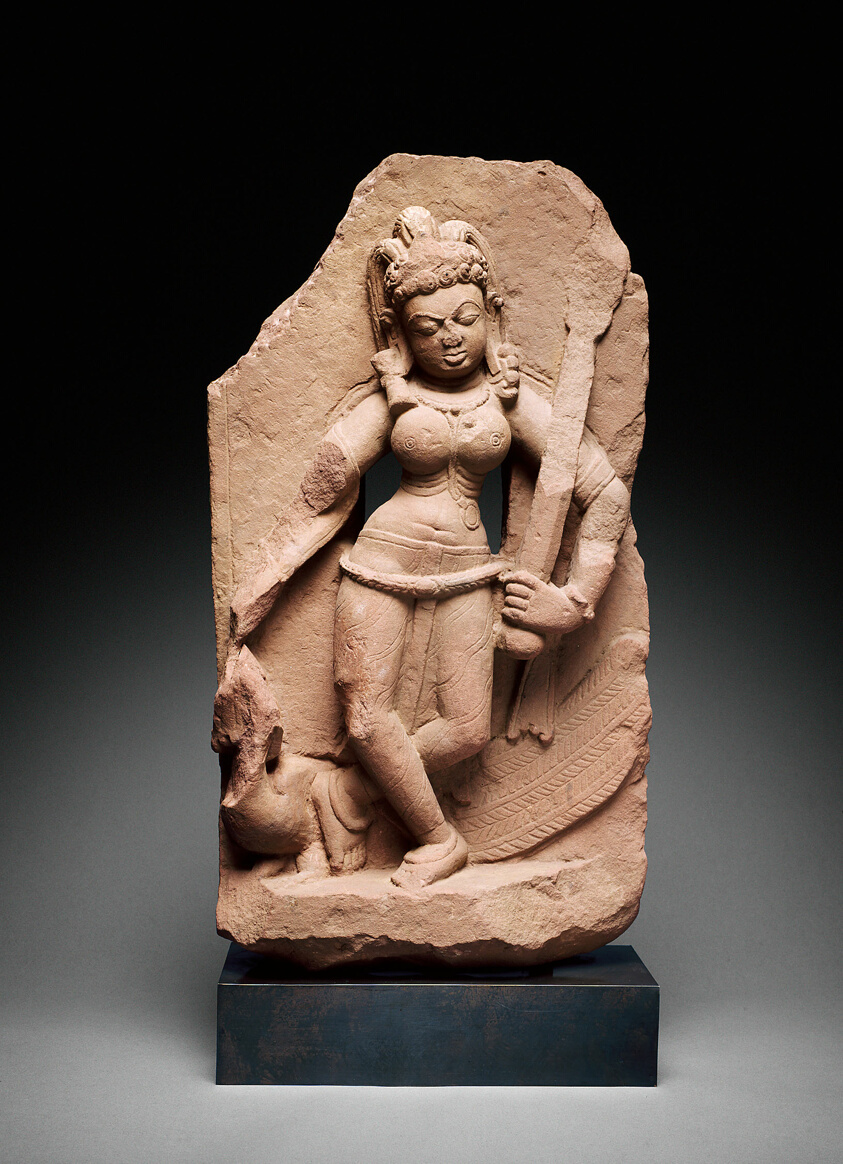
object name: Sculpture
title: Dancing Mother Goddess Kaumari with Peacock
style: South Asian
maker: India; Madhya Pradesh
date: 9th/10th century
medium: Sandstone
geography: Madhya Pradesh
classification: stone (unidentified); stone; sculpture; asian art